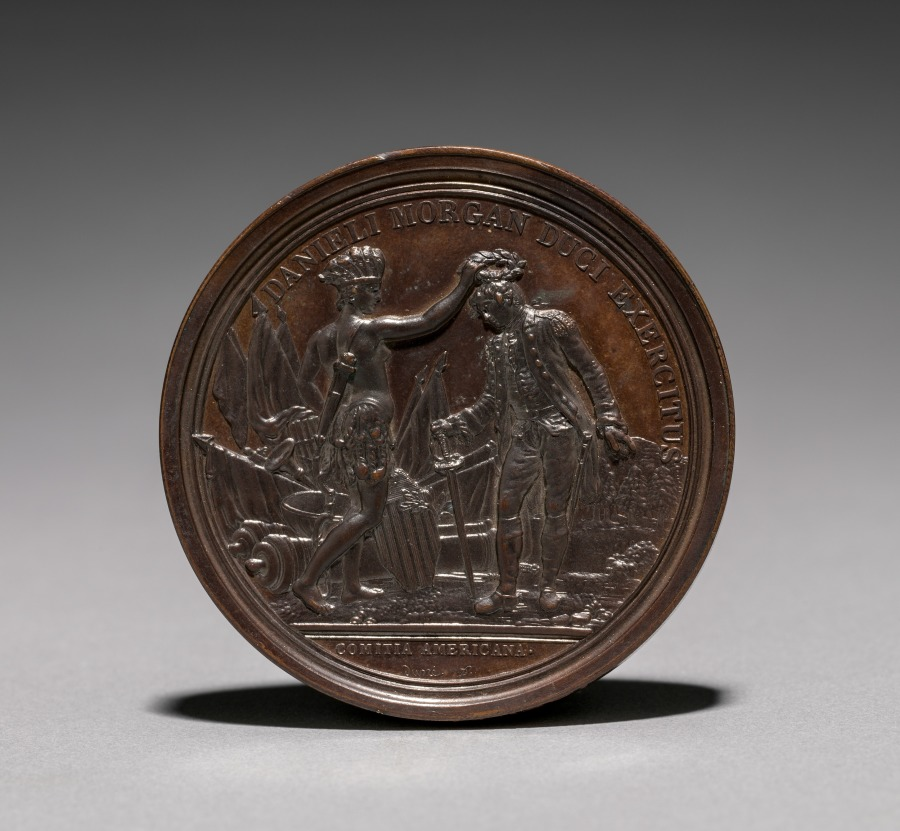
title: Medal: Daniel Morgan (obverse)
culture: France, 19th century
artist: Jules Dupré (French, 1811–1889)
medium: bronze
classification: Metalwork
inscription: Danieli Morgan duci exercitus. Comitia Americana.